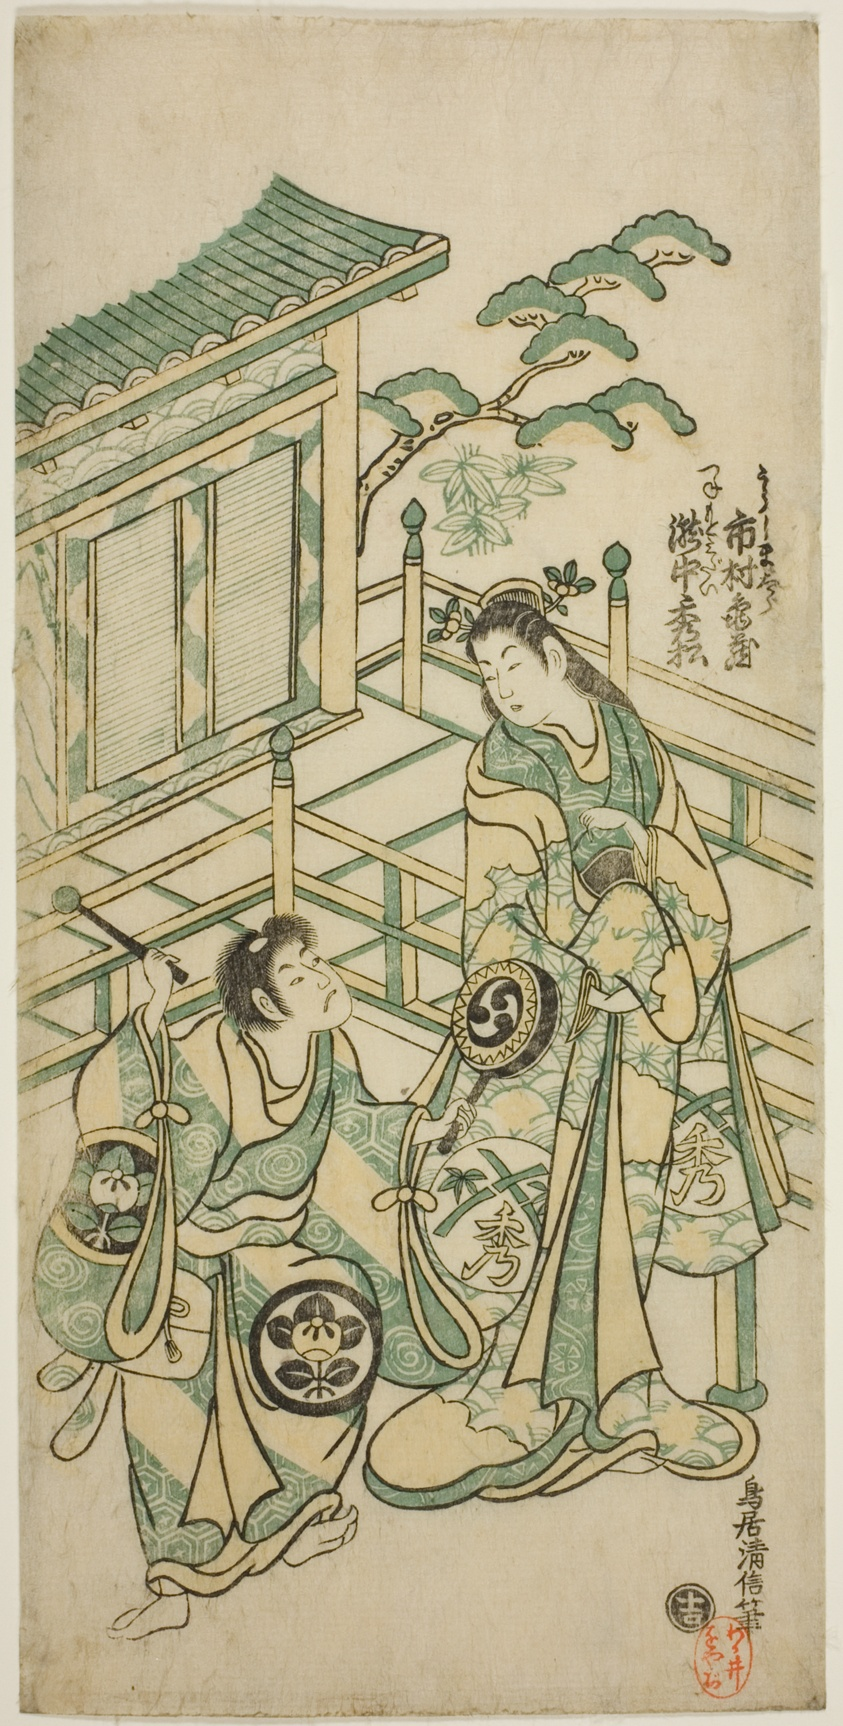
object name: Print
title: The Actors Ichimura Kamezo I as Urashima Taro and Takinaka Hidematsu I as Kanemoto Gozen in the play "Ichi no Tomi Seiwa Nendaiki," performed at the Ichimura Theater in the fifth month, 1746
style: Japanese (culture or style)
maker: Torii Kiyonobu II (Japanese, active c. 1725-61)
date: 1746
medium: Color woodblock print; hosoban, benizuri-e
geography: Japan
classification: woodblock print; print; asian art